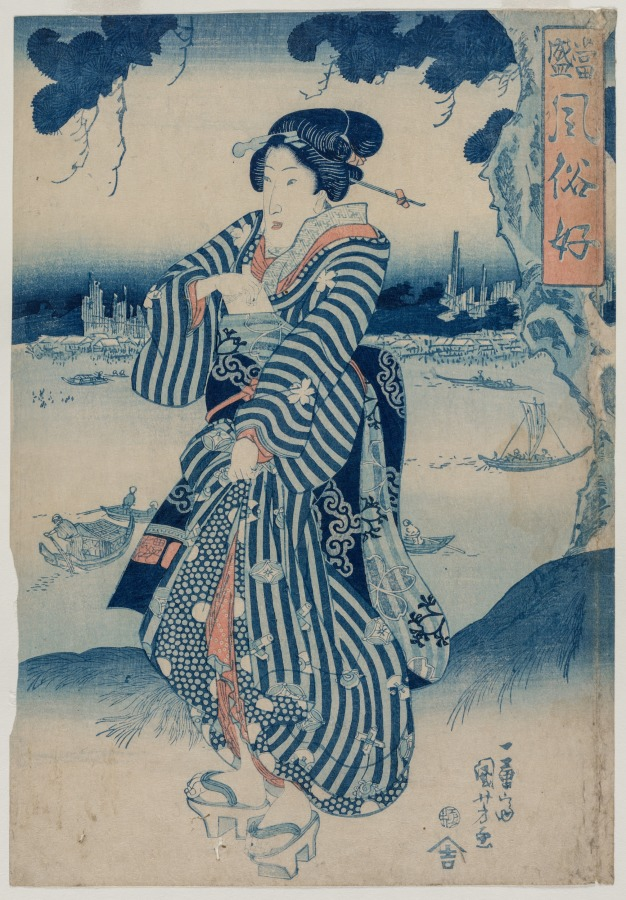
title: Geisha Standing on the Bank of the Sumida River (from the series People Who Like the Latest Fashions and Manners)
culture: Japan, Edo period (1615–1868)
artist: Utagawa Kuniyoshi (Japanese, 1797–1861)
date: early 1830s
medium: color woodblock print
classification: Print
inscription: Signature: Ichiyusai Kuniyoshi ga Publisher: Izutsuya (emblem) Censorship Seal: kiwame